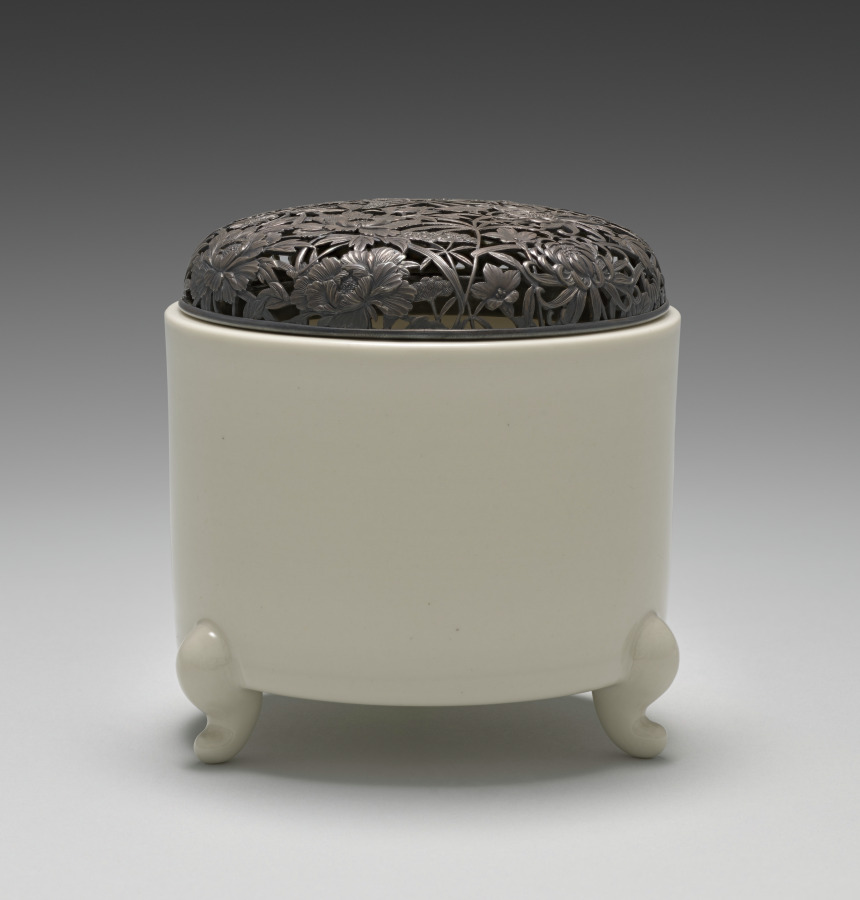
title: Incense Burner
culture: Japan, Meiji period (1868–1912)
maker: Seifū Yohei III (Japanese, 1851–1914)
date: 1893–1914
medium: Porcelain with creamy white glaze and molded design and floral openwork silver lid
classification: Ceramic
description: Yohei III made incense burners in a wide variety of designs and styles. The body and glaze of this one are taihakuji, or “great white porcelain,” an important early invention Yohei III devised in 1872. The burner has rounded, cabriole legs, resembling tiny table legs, attached to the exterior and the faintest decorative band around the bottom. Lids were produced outside the studio by metalwork specialists. For this incense burner, they created a floral-patterned silver lid.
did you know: This cylindrical incense burner has a distinctive translucent, creamy glaze over an ivory-colored clay body.